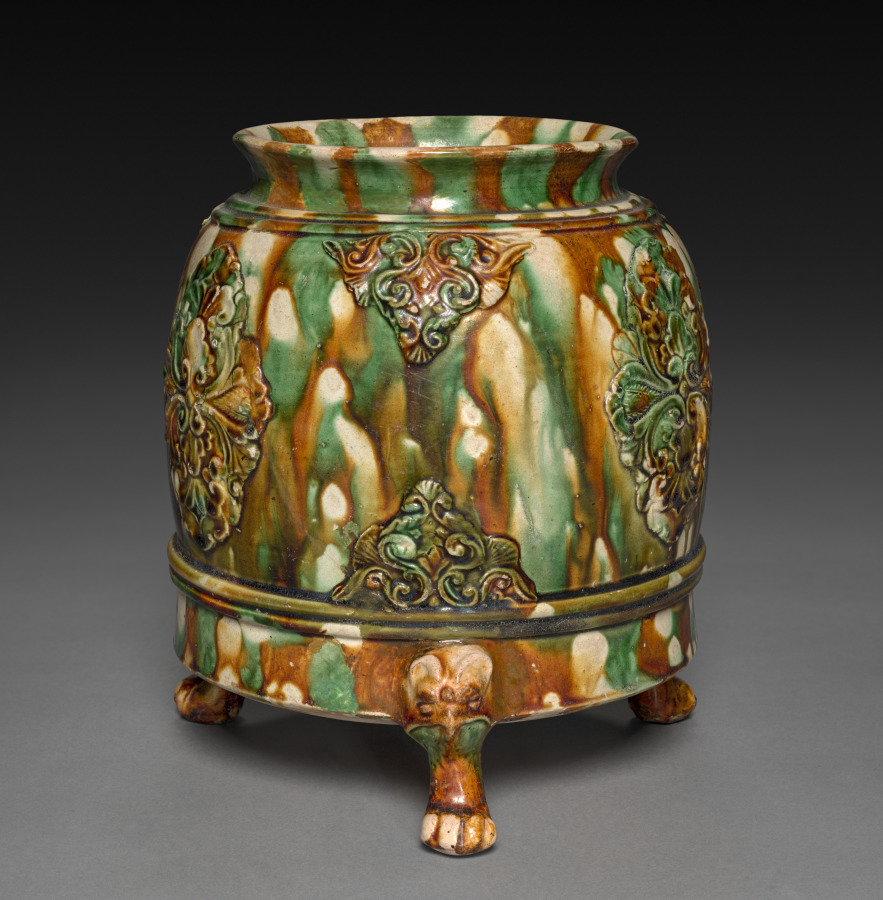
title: Jar with Applied Floral Decoration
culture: China, Tang dynasty (618-907)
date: 618–907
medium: Glazed earthenware, sancai (three-color ware)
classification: Ceramic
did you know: This sancai-glazed Tang vessel stands on three paw-shaped feet.